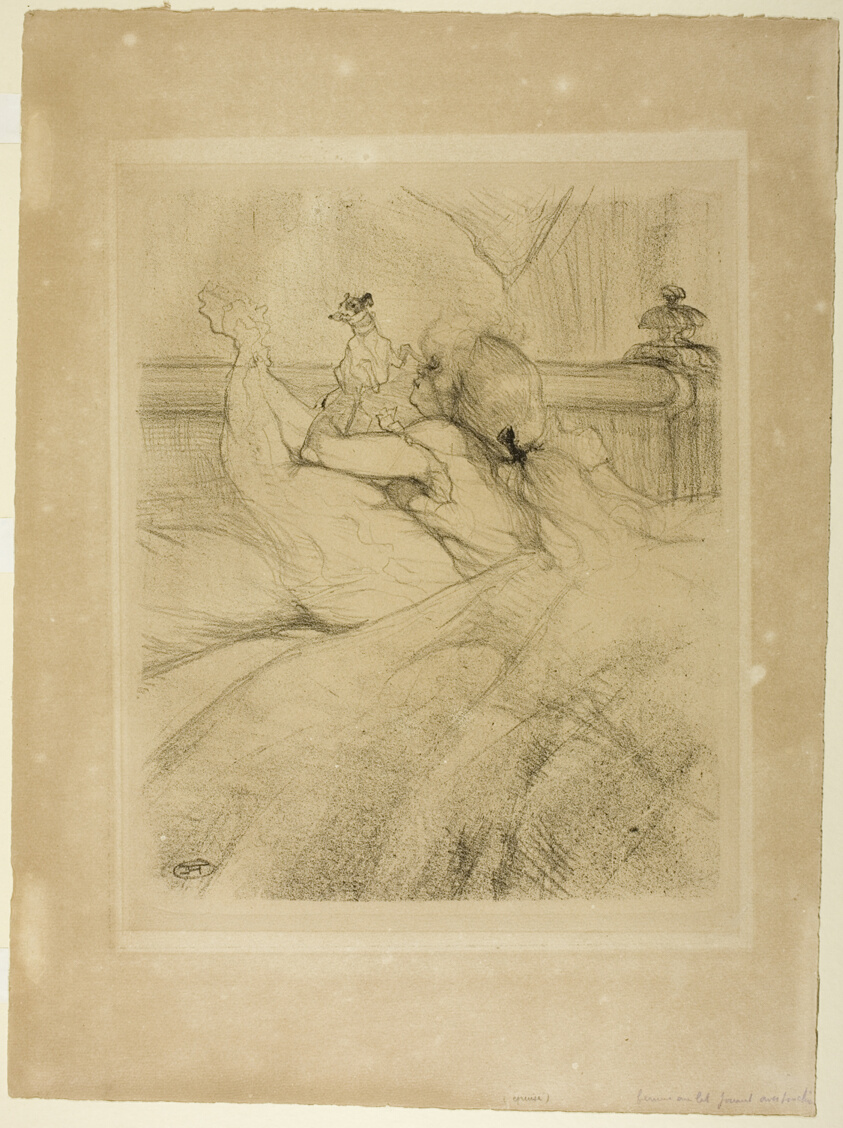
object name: Print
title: In Bed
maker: Henri de Toulouse-Lautrec (French, 1864-1901)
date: 1898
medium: Lithograph on tan or gray-brown wove paper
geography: France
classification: lithograph; print; prints and drawing